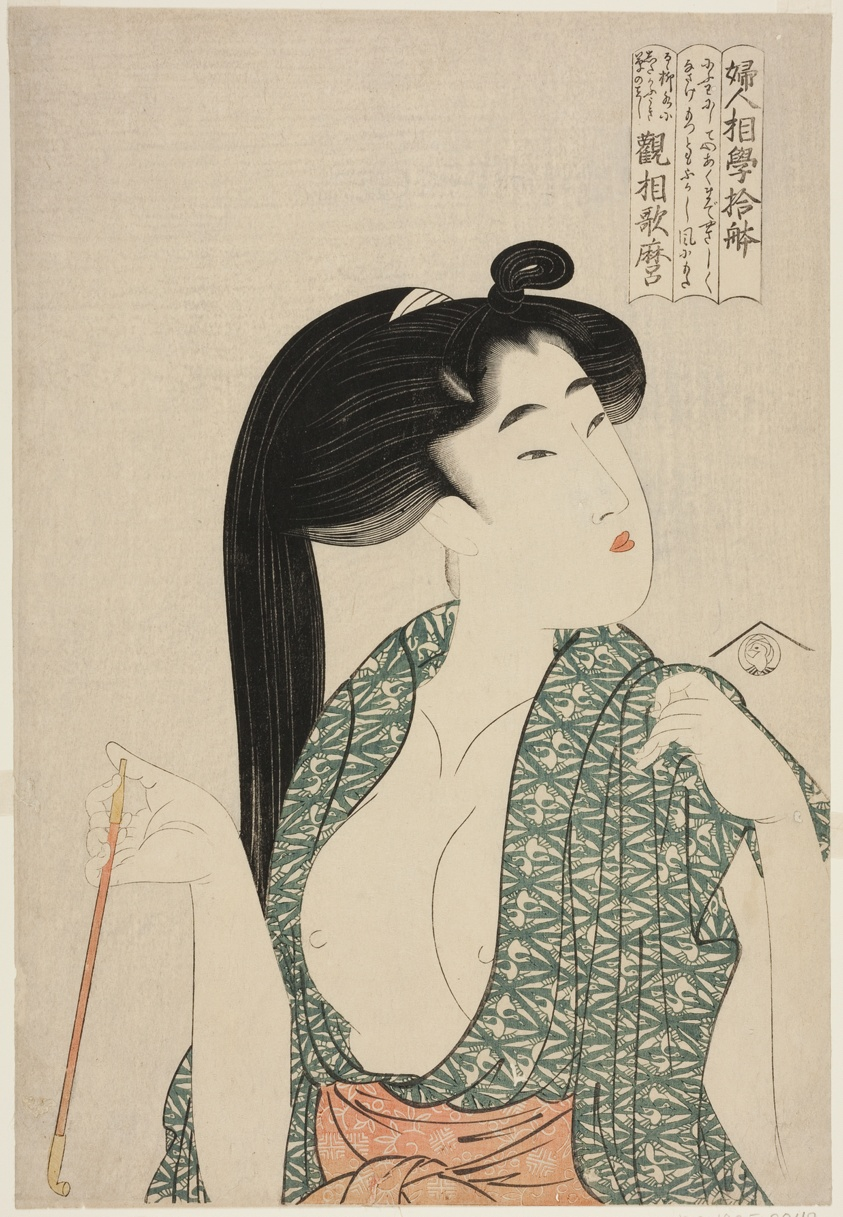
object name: Print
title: Pipe, from the series Ten Types in the Physiognomic Study of Women (Fujin sogaku juttai) (Kiseru)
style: Japanese (culture or style)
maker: Kitagawa Utamaro 喜多川 歌麿; Japanese, 1753 (?)-1806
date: 1802/03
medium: Color woodblock print; oban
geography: Japan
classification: woodblock print; print; asian art